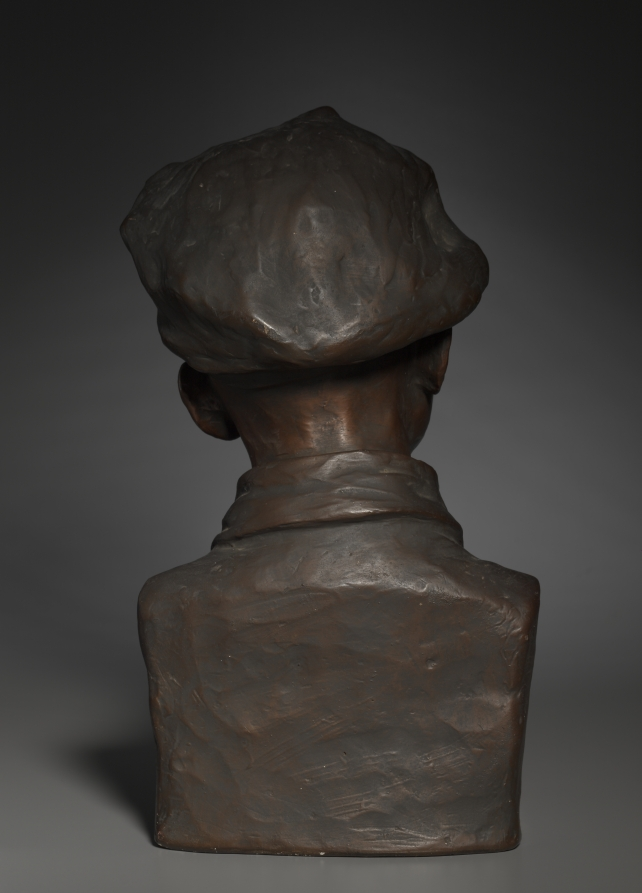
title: Gamin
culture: America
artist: Augusta Savage (American, 1892–1962)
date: c. 1929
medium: hand-painted plaster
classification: Sculpture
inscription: signed on right-side: "Savage"; titled across the bottom-front: "Gamin"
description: Augusta Savage was the most acclaimed sculptor working during the Harlem Renaissance of the 1920s and ‘30s, and Gamin is her most famous work. It was long thought that the image was a generic figure; however, recent research reveals that it depicts her nephew. The warm characterization likely arises from the close bond shared between artist and model. Although several small versions of the sculpture were produced, this life-size, hand-painted plaster is unique, and likely the oldest surviving example of the subject.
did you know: A trailblazer, Savage was the first African American member of the National Association of Women Artists.